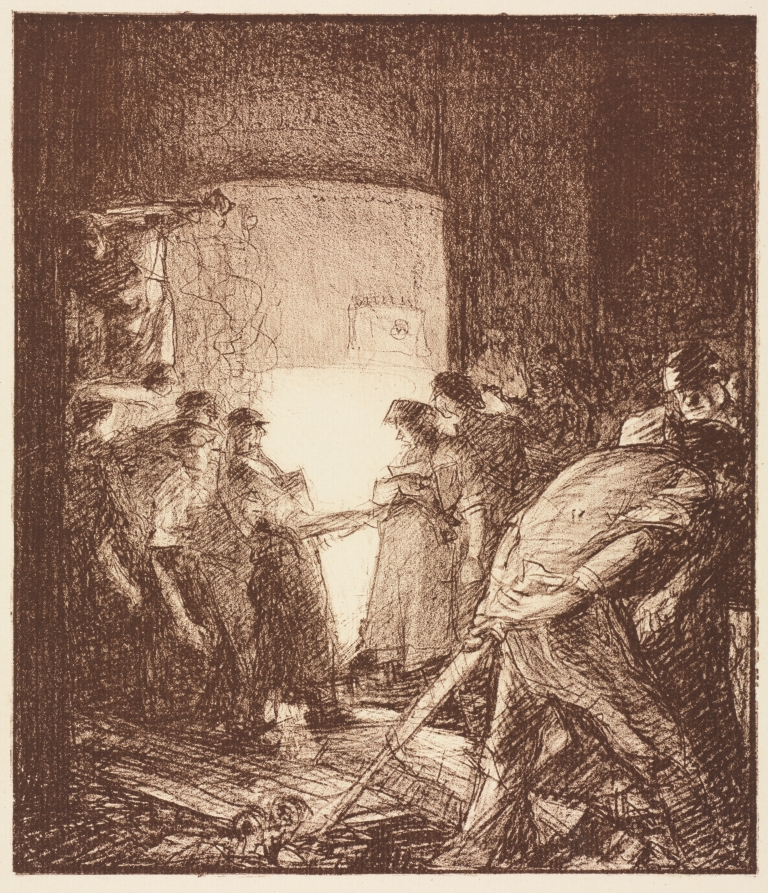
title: Blast Furnace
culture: England, 20th century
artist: Frank Brangwyn (British, 1867–1956)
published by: Die Graphischen Kunst ?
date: 1905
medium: lithograph printed in brown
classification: Print